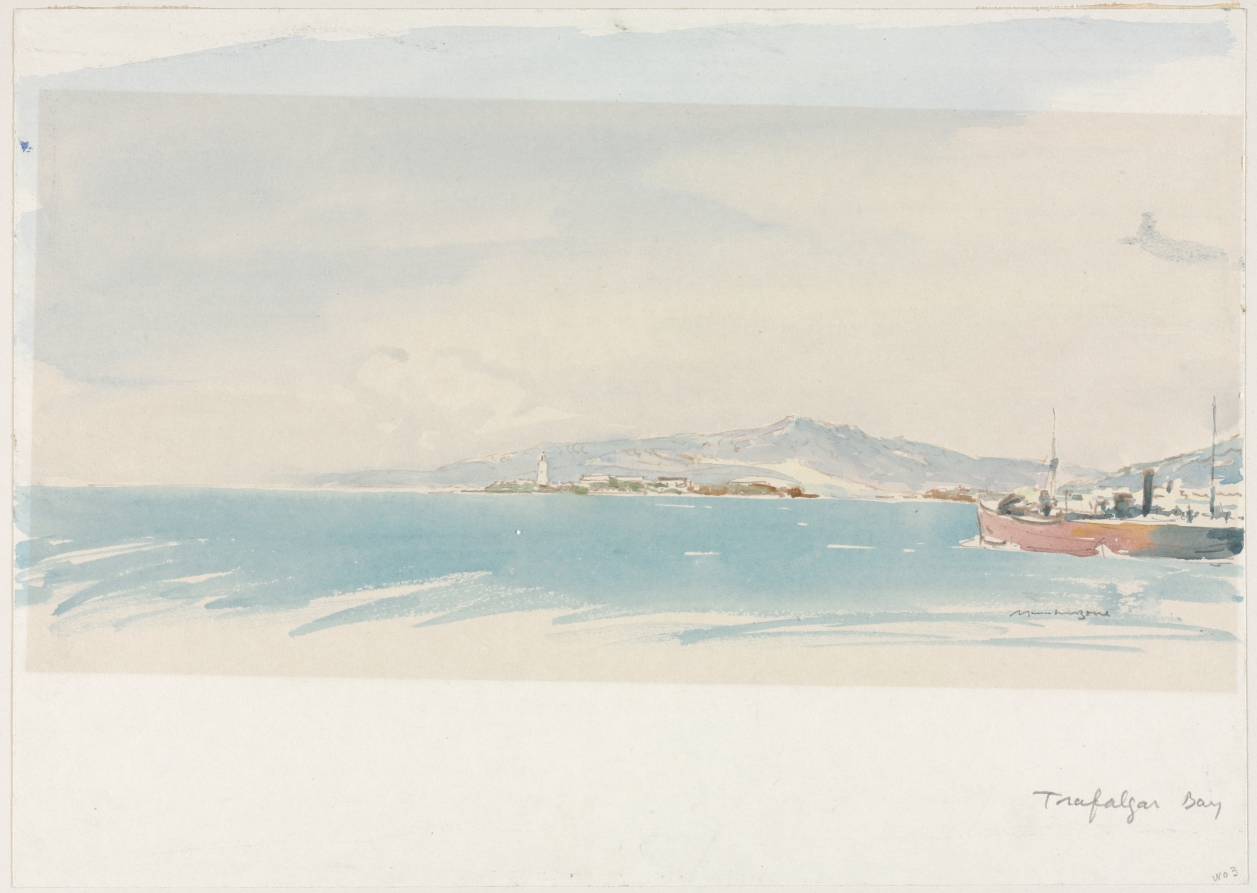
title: Trafalgar Bay, Spain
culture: England, 20th century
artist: Muirhead Bone (British, 1876–1953)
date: c. 1896–1940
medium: watercolor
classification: Drawing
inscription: Signed "Muirhead Bone" lower right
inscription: Label on verso: "Frederick Keppel & Co., Inc., NYC"